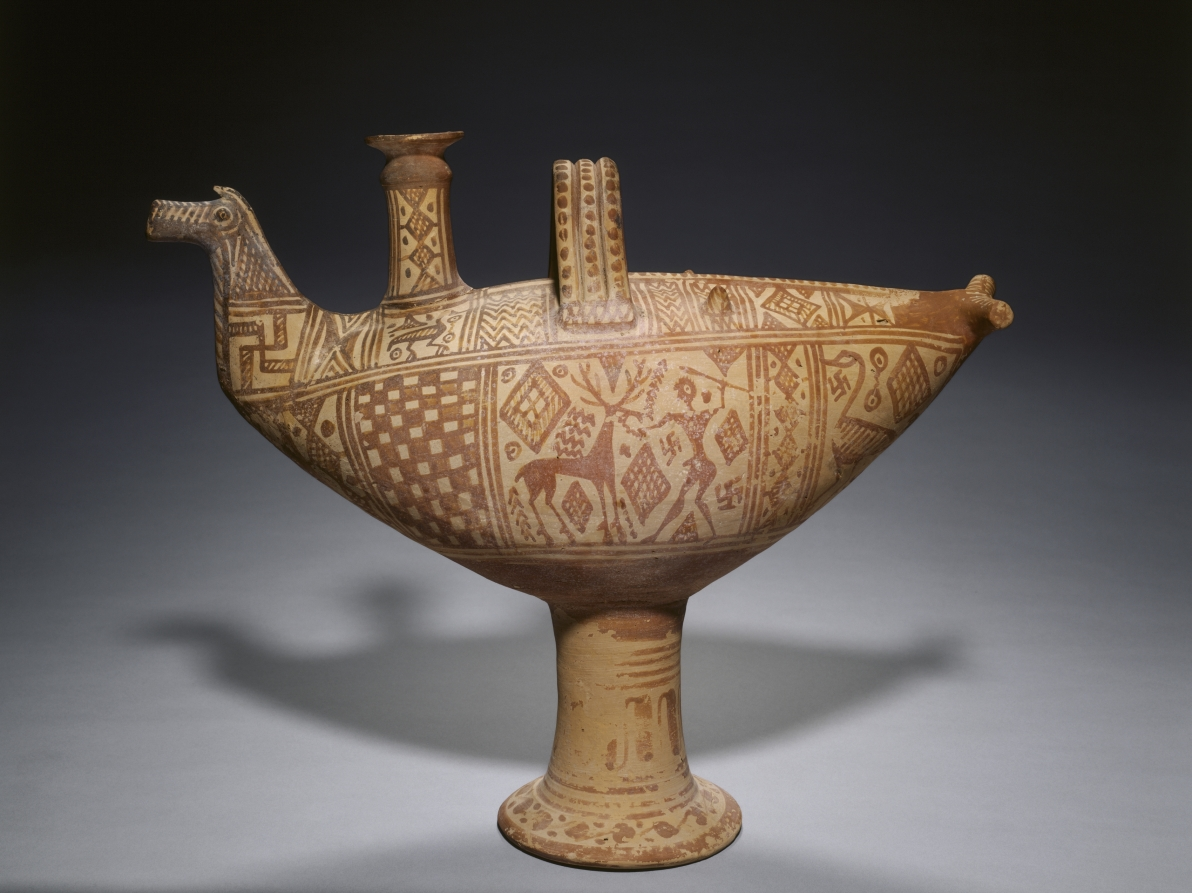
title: Italo-Geometric Bird Askos (Oil Vessel): Hunter (Herakles?) and Stag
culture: Etruscan, likely made at Vulci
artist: attributed to Bisenzio Class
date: c. 700 BCE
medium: ceramic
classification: Ceramic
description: This bird-shaped askos (oil vessel), with a tall filling spout and a pierced beak for pouring, perhaps held perfumed oil for a funerary function. Although the shape likely stems from Italian tradition, the abundantly painted geometric decoration, covering nearly every available surface, derives originally from Greece. Thus scholars have suggested that an immigrant Greek potter working in Etruria may have made the vessel. The sole narrative scene shows a man with a spear leading an antlered animal. If not an anonymous hunter, this could be the earliest known representation of the hero Herakles performing his third labor: capturing the golden-antlered Keryneian hind, or female deer.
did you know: This askos may feature the earliest known representation of Herakles's third labor, the Keryneian hind.